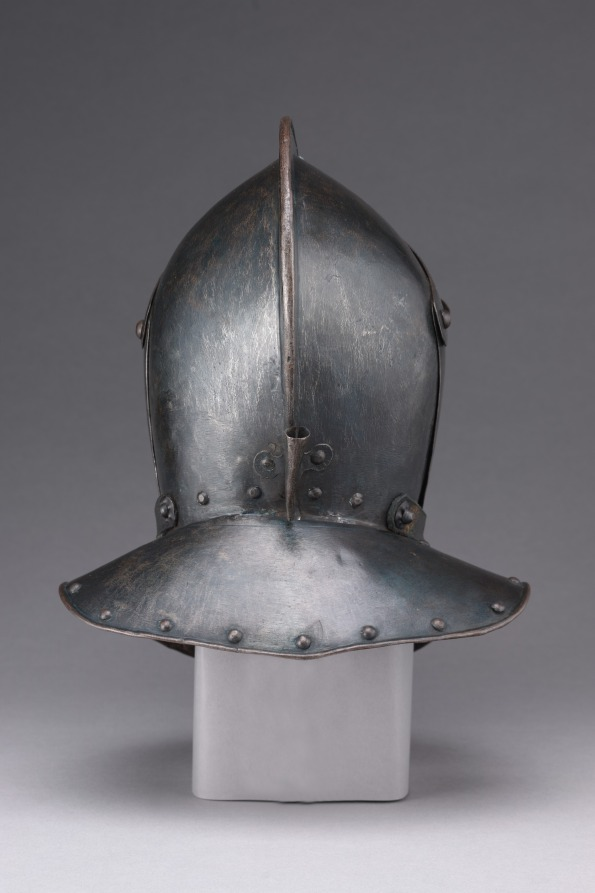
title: Cuirassier's Armor: Helmet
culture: Austria, Graz(?), early 17th century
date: c. 1600–20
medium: steel (originally blued, now black); leather straps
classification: Arms and Armor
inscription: Proof mark (musket shot) is located on the proper left side of the breastplate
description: The cuirassier was the heavy cavalryman of the late 1500s and early 1600s. Carrying pistols and a sword, he was clad in full armor, with the exception of his lower legs, which were protected by heavy riding boots. Shortly after 1650, such heavy cavalry armor disappeared from use. By then, European cavalries had abandoned full armor as impractical against the increased sophistication of firearms.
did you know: When assembled, this suit of armor is just over 5-1/2 feet tall.